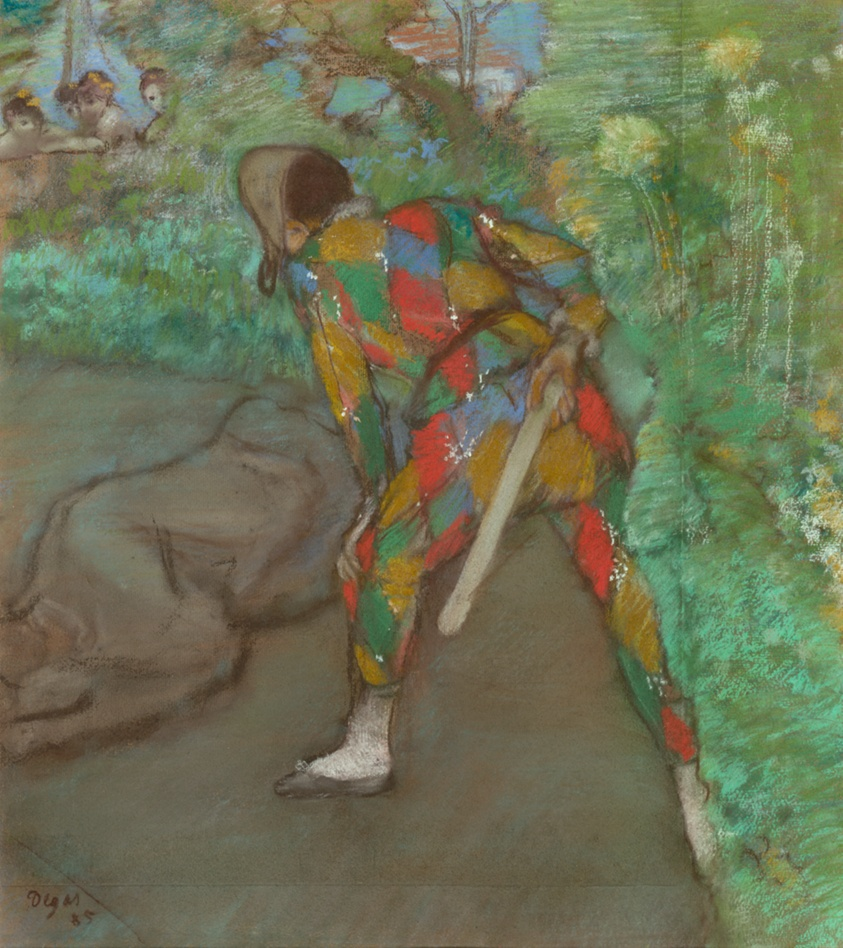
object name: Drawing and Watercolor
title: Harlequin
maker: Edgar Degas; French, 1834-1917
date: 1885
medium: Pastel on cream laid paper, pieced at bottom and right and laid down on board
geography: France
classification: pastel; drawings (visual works); prints and drawing; paper